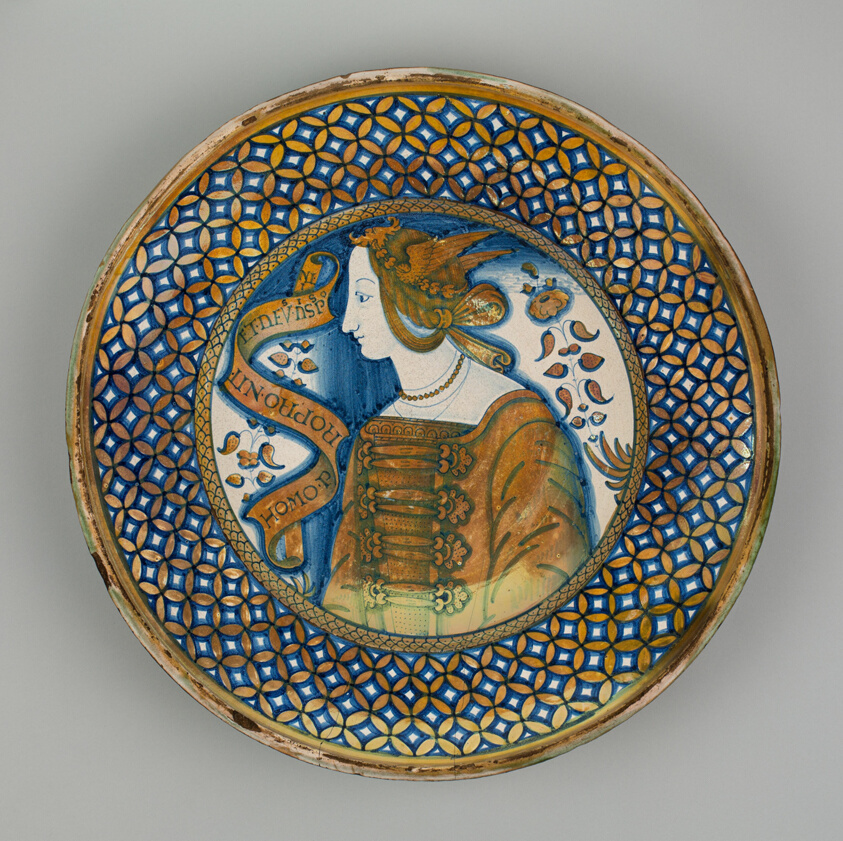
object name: Ceramics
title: Display Plate with the Bust of a Woman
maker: Italian; Deruta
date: 1500/30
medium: Tin-glazed earthenware with copper luster (maiolica)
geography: Italy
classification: ceramics; european decorative arts; decorative arts